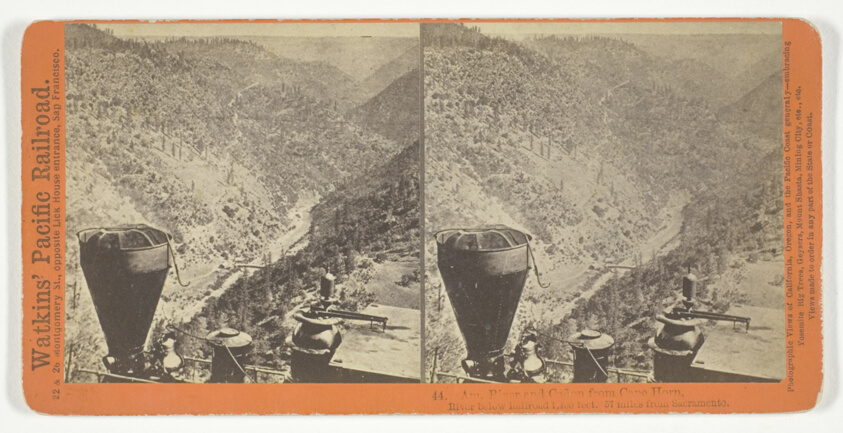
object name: Photograph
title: Am. River and Canon from Cape Horn, River below Railroad 1,400 feet. 57 miles from Sacramento, No. 44 from the series "Watkins' Pacific Railroad"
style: 19th century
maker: Alfred A. Hart (American, 1816–1908)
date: 1864/69, printed 1870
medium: Albumen print, stereo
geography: United States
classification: stereograph (albumen); albumen silver print; photographic process; photography; photograph